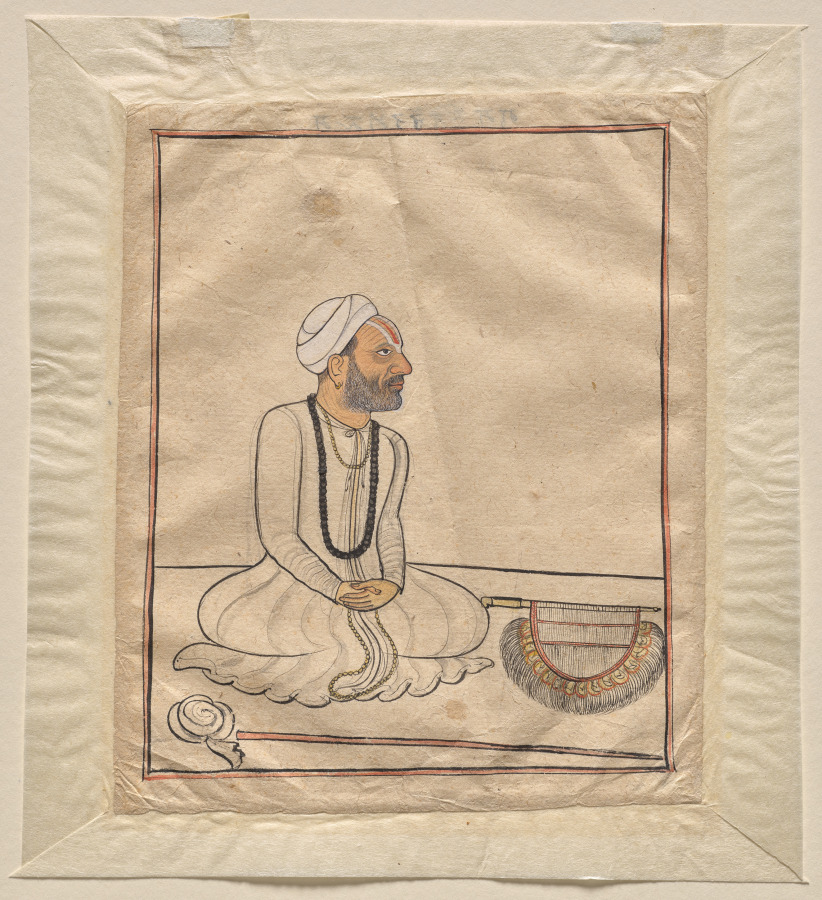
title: Gosain Narottam Das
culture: Northern India, Pahari kingdoms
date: c. 1720–30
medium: gum tempera and ink on paper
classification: Painting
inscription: Inscription in Takri on reverse: "Gusain Narottam Das" (Gosain Narottam Das)